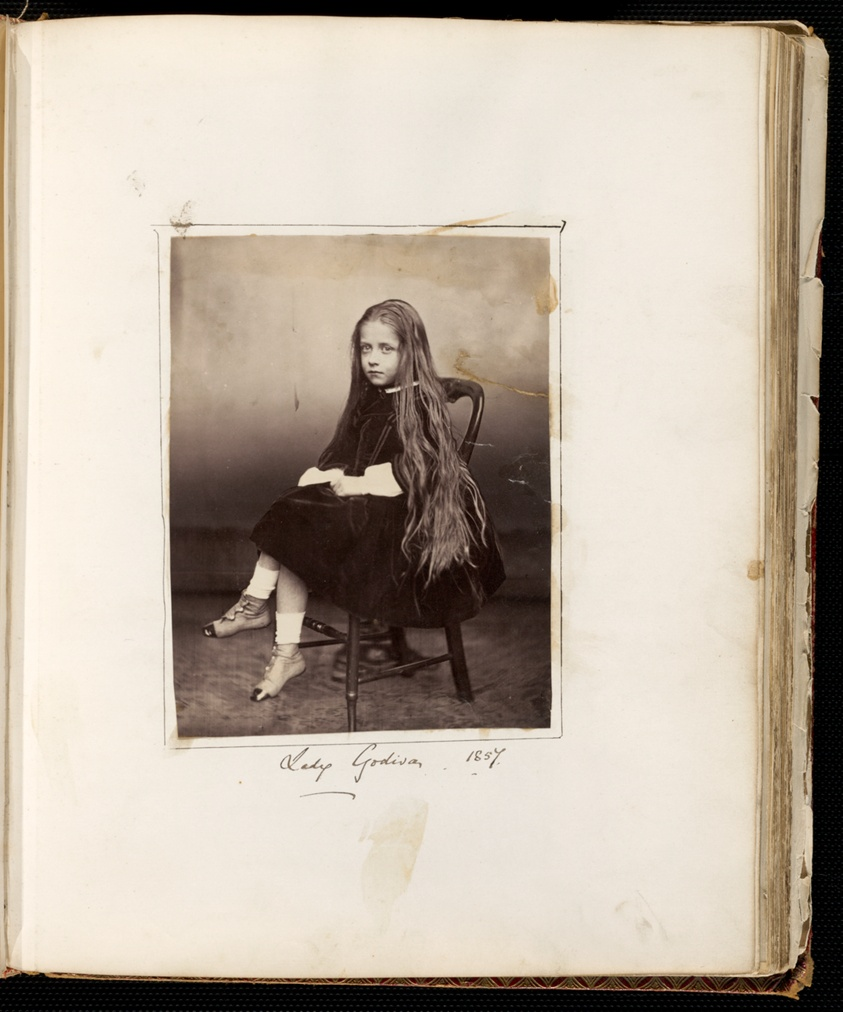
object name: Photograph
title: Untitled (Lady Godiva)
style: 19th century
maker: Artist unknown; English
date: 1857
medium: Albumen print, from the "Untitled Album"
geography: England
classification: photograph; albumen silver print; photography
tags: Collected by Hugh Edwards